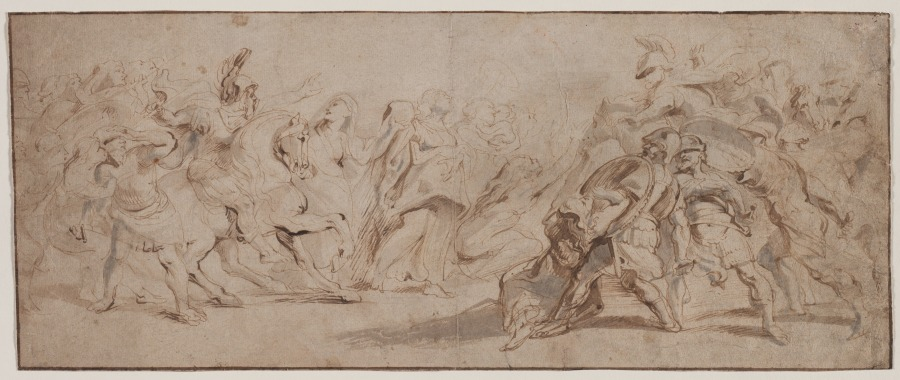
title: Reconciliation of the Romans and the Sabines (recto) Venus Disarming Mars, Drapery Study (verso)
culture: Flanders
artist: Peter Paul Rubens (Flemish, 1577–1640)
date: c. 1632/35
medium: pen and brown ink and brush and gray and brown wash; framing lines in brown ink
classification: Drawing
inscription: ON AN OLD SUPPORT (now removed): in graphite: 200 x 489 mm ; in graphite: Rubens [JUS ?] ; stamped in red ink: ZOLL / I-26 / + [circled] (according to departmental cataloging sheet this is a Swiss customs stamp) ; ON AN OLD SUPPORT (now removed): embosed in red ink: P.P. Rubens ; ON OLD BACKING? (now removed): in blue ink: Versöhnung der Römer und Sabiner / auf der Rückseite: Venus entwaffnen Mars / ausst. von Rubens zeichnungen, / antwerpen, Rubenshaus sommer 1956 No 117 ; in graphite: Royal accademy, winter exhibition 1953/4